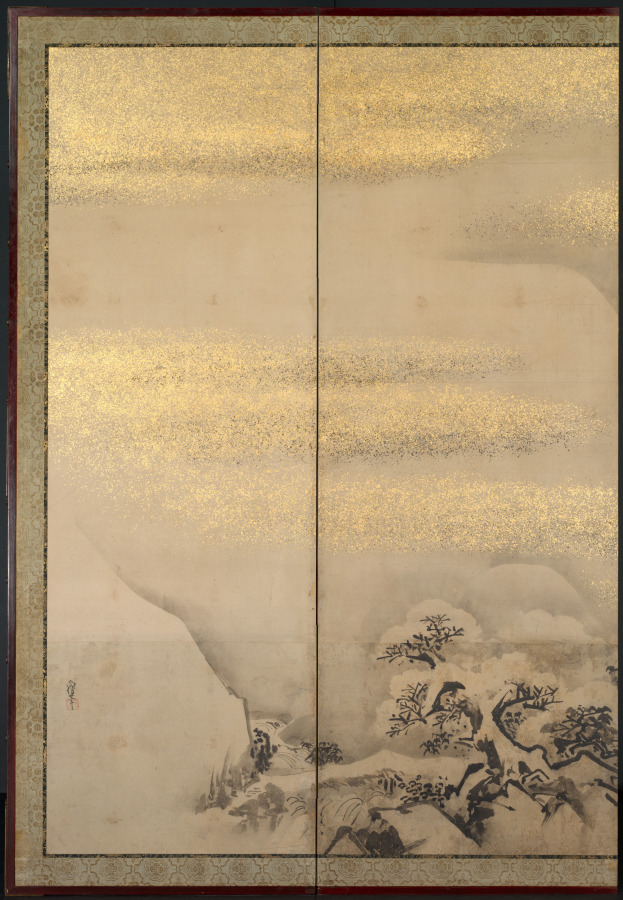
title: Summer and Winter Landscapes (one of a pair)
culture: Japan, Edo period (1615–1868)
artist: Kano Naonobu (Japanese, 1607–1650)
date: 1600s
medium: six-panel folding screen; ink on gold- and silver-decorated paper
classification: Painting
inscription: signed: "Jitekisai Naonobu"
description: This sparse composition depicts a summer scene on the right and a winter scene on the left. Careful observation reveals that the pair of screens was once damaged, and a later conservation including new sections of paper and inpainting sought to preserve the original flavor of the paintings so they could continue to be appreciated. Kano Naonobu was born in Kyoto, the younger brother of major painter and authenticator Kano Tan’yū (1602–1674). He relocated to Edo (present-day Tokyo) at the behest of the Tokugawa government in 1630 where he worked with his brother and teacher. In Kyoto, he helped his brother with paintings for Nijō Castle and the major Pure Land Buddhist temple Chion’in.